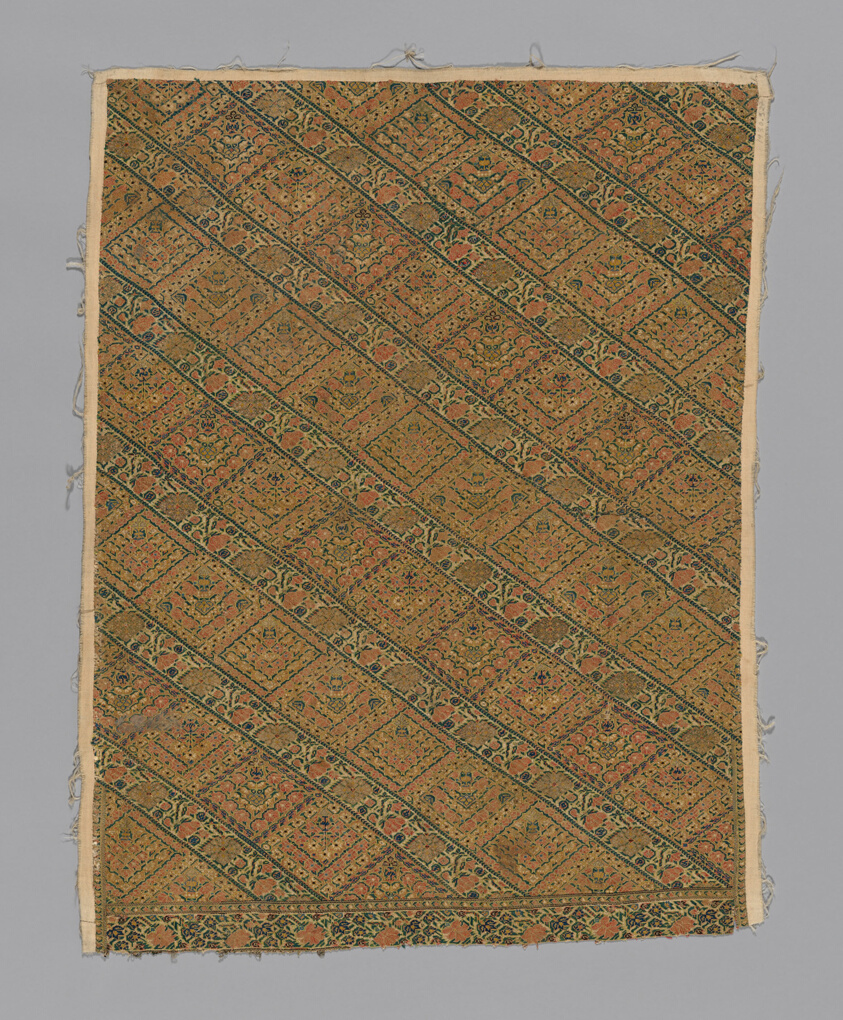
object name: Textile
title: Fragment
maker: Iran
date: 19th century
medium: Colored silk on linen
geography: Iran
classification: textile; needlework (visual works)